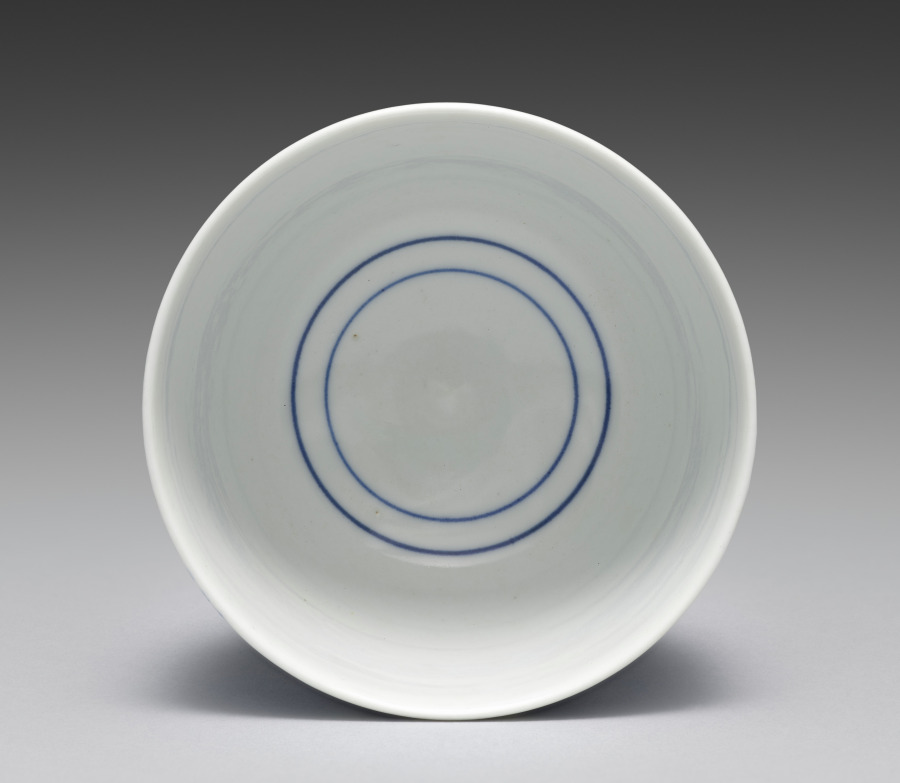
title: Teacup from Teacups with a Hundred Sages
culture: Japan, Meiji period (1868–1912)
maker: Seifū Yohei III (Japanese, 1851–1914)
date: 1893–1914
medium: One from a set of five teacups; porcelain with underglaze blue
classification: Ceramic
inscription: 清風造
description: Each of these five teacups has a painting of identical design in underglaze blue, but as the tiny figures are drawn entirely by hand, each cup has its own personality. The theme of the sencha cups is an assembly of sages or immortals, literally “a hundred venerable [people]” (hyakurō). The myriad figures crowd the scene in groups. The god of longevity, with his tall forehead, sits with his cranes, having flown in from Mt. Penglai on the Isle of the Immortals. Seven long-bearded sages sit around a stone table, chatting and drinking; one is seated on an enormous gourd. Of course, there is a stack of books on the table, and elsewhere, scrolls are being written upon or read—in one case held very close by a sage who is wearing glasses. The design was enormously popular in ceramics made for those engaged in literati culture.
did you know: Seifū Yohei III (1851–1914) produced many works for tea gatherings where people drank Chinese-style leaf-tea (sencha).